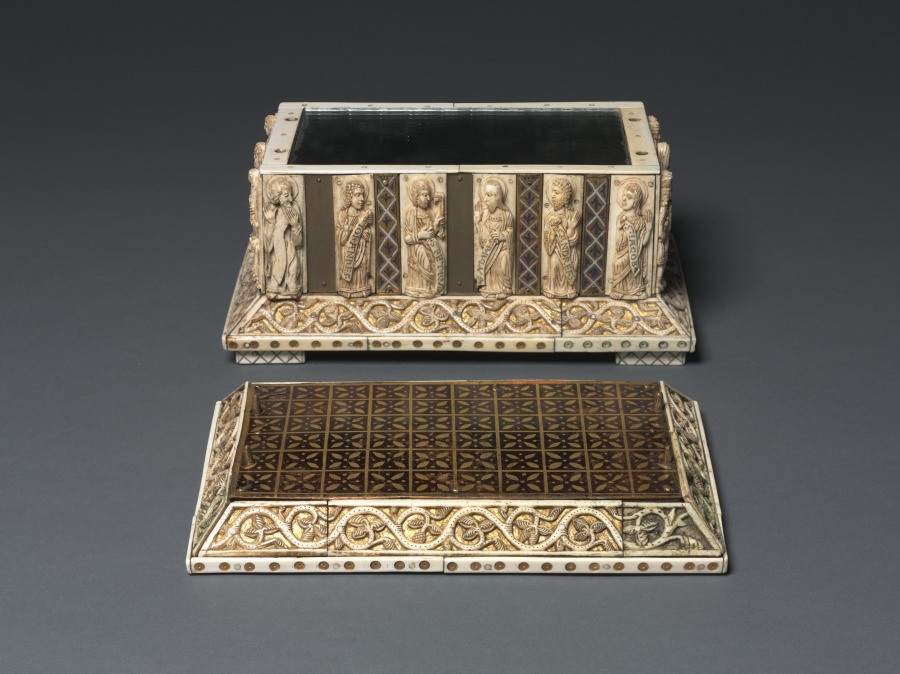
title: Portable Altar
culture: Germany, Cologne, Gothic Period, 13th century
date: c. 1200–1220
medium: walrus ivory, gilded copper, porphyry, champlevé enamel, wood core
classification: Ivory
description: The principal decoration of this portable altar is carved of walrus ivory. On the long sides are traditional figures of standing apostles. On the short sides are the seated Virgin with the Magi, and Christ the Judge between the symbols of the Evangelists. The commercial ties between the Rhineland and the Norse peninsula made walrus ivory easily available to the city of Cologne, one of the most important artistic centers in medieval Germany.